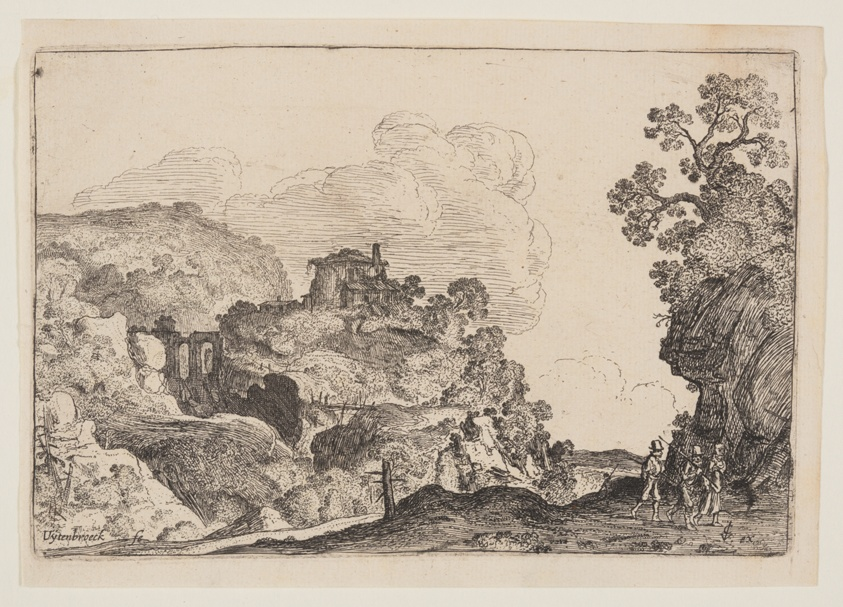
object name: Print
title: Rocky Landscape with Three Travelers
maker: Moses van Uyttenbroeck (Dutch, c. 1595–before 1647)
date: c. 1620-1640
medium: Etching on ivory laid paper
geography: Netherlands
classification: etching; paper; print; prints and drawing